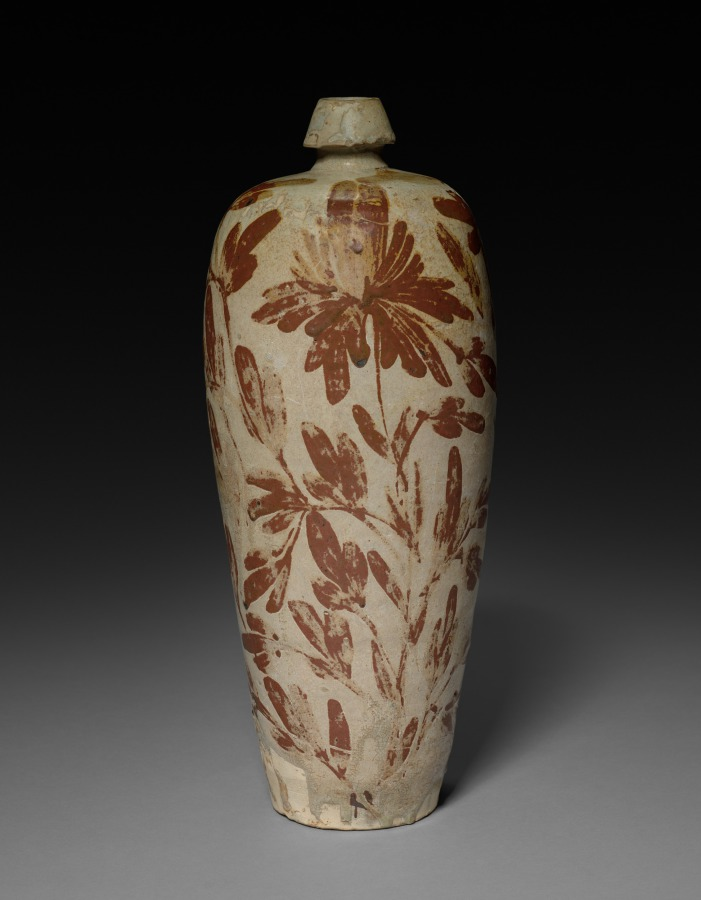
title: Vase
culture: China, Northern Song dynasty (960–1127)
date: 1100s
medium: Buff stoneware with underglaze slip coating, Cizhou ware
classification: Ceramic